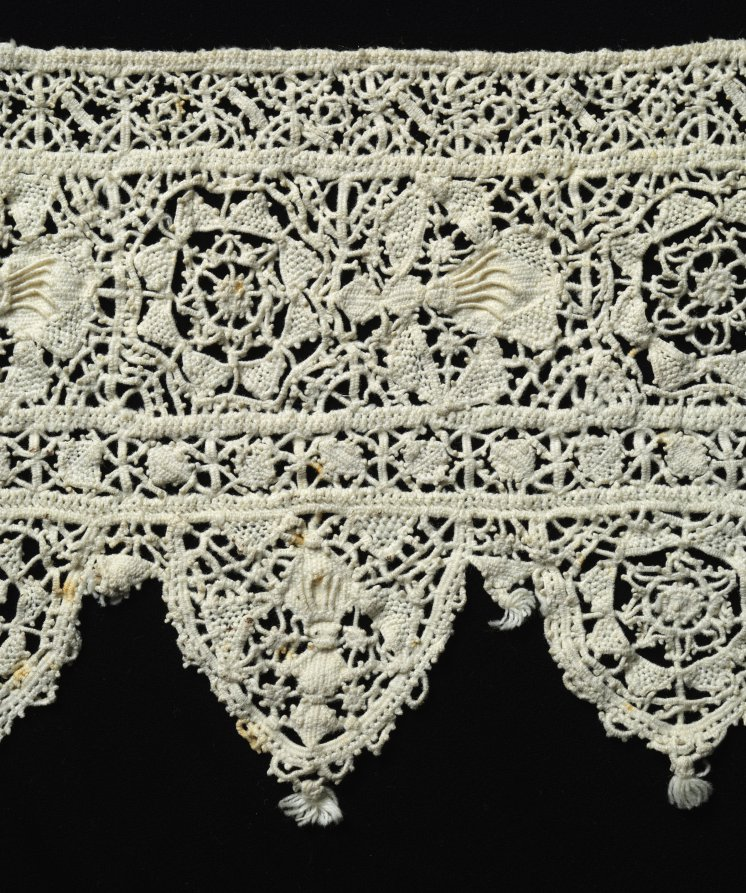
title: Lace Edging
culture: Italy, 1600s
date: 1600s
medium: Linen: needle lace (reticella)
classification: Lace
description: In this piece of lace edging, squares with a geometric design alternate with a motif of a bee, the symbol of the Barberini family.